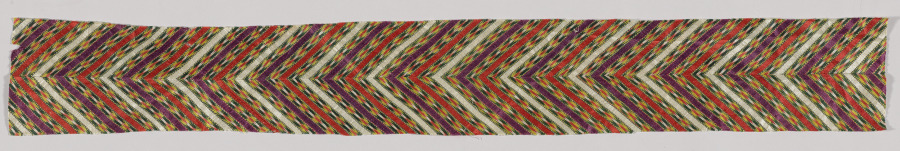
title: Fragment of Striped Satin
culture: India, Surat, 19th century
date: 1800s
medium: satin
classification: Textile